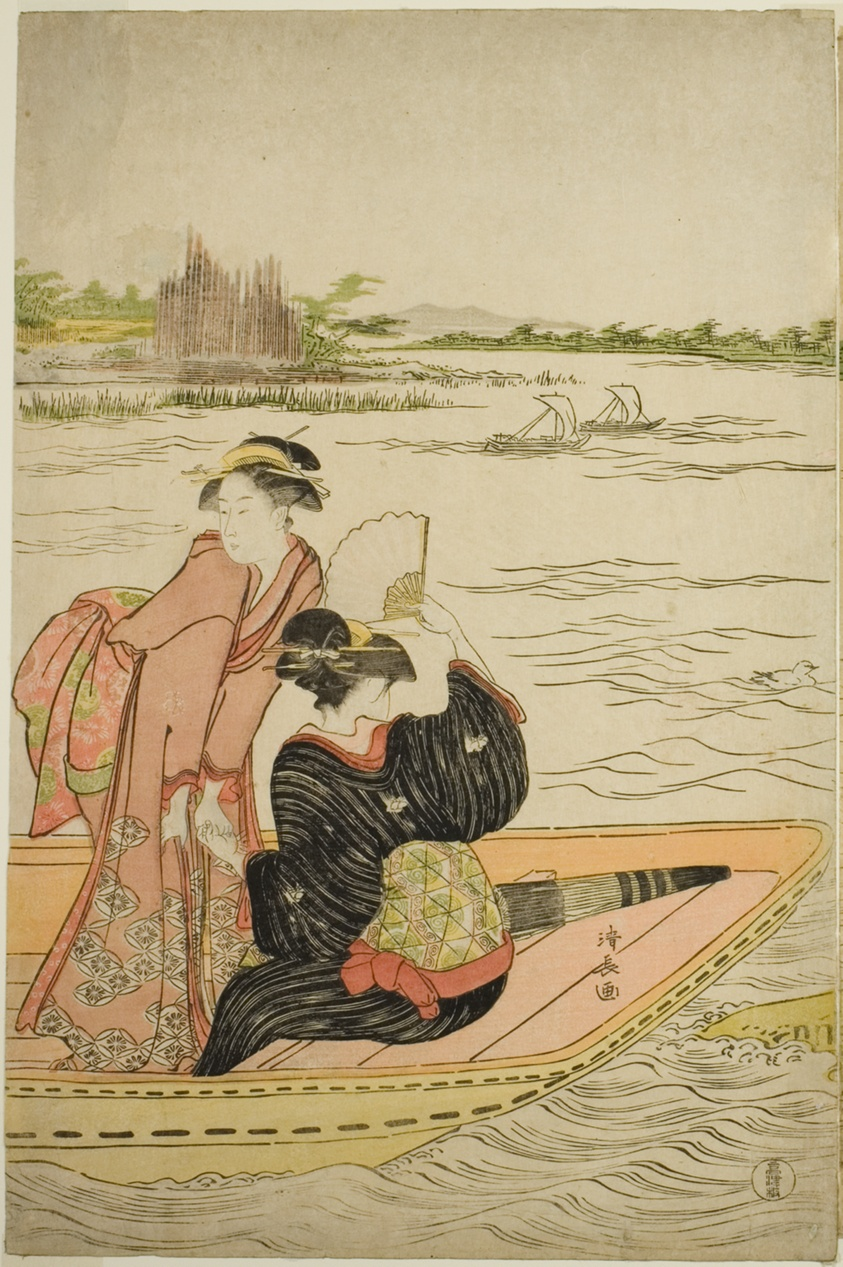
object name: Print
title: A Ferry on the Sumida River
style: Japanese (culture or style)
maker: Torii Kiyonaga (Japanese, 1752-1815)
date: c. 1787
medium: Color woodblock print; center sheet of oban triptych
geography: Japan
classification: woodblock print; print; asian art